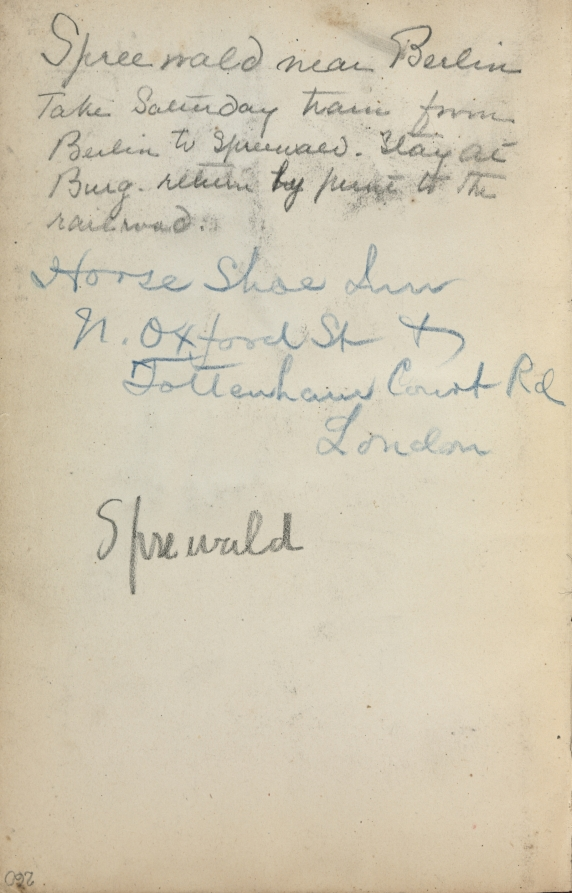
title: Italian Sketchbook: Notes (page 260)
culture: America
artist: Maurice Prendergast (American, born Newfoundland [now Canada], 1858–1924)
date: 1898–1899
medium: pencil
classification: Bound Volume